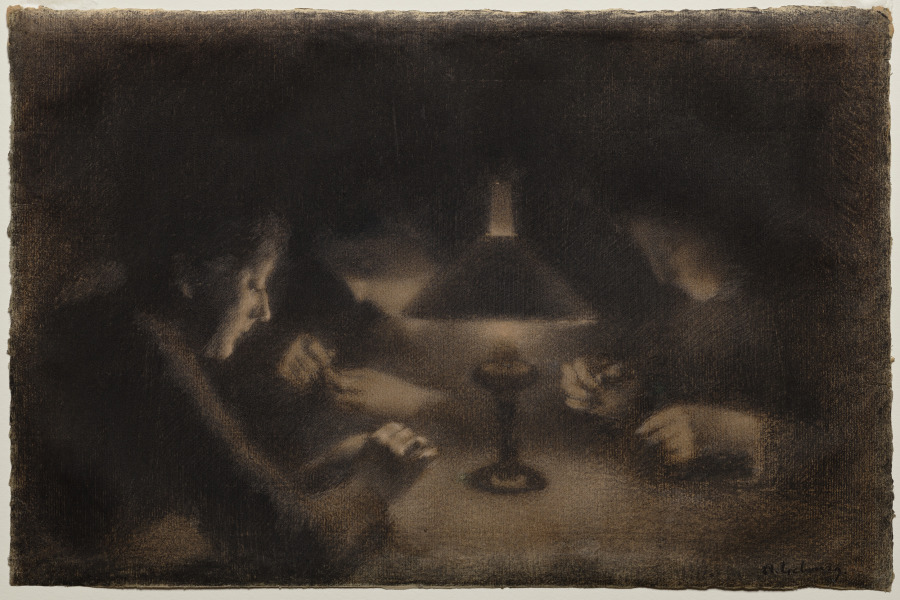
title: Evening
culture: France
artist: Albert-Charles Lebourg (French, 1849–1928)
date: c. 1879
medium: conté crayon and charcoal with stumping and white gouache on laid paper discolored to brown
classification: Drawing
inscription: signed, lower right, in black ink: A. Lebourg [illeg.]; watermark, upper right: Lalanne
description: In this drawing, Albert Lebourg depicted his mother, sister, and wife sewing by the dim light of an oil lamp. The three women sit around a table, close to one another but each absorbed in their work. Known for his experimentation with charcoal, Lebourg worked from dark to light, covering his sheet with the dark, powdery material and leaving only highlights visible.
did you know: This drawing influenced a young Georges Seurat, who likely saw it on view at the 1879 Impressionist Exhibition and created his own interpretation of the subject in dark conté crayon soon after.